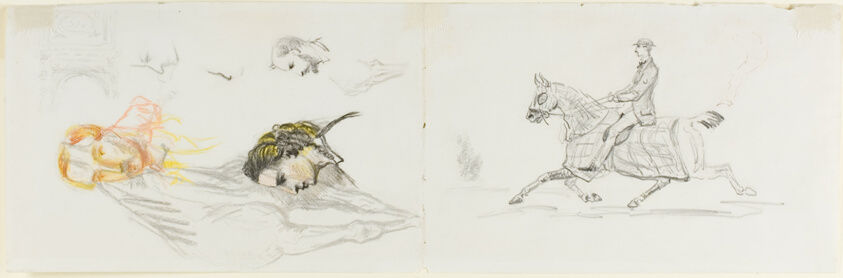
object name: Drawing and Watercolor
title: Horse-Drawn Carriage Preceded by Single Rider (recto); Man Riding Horse with a Blanket and Sketches of Heads, Horses and Triumphal Arch (verso)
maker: Henri de Toulouse-Lautrec (French, 1864-1901)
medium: Graphite (recto), and graphite and pastel and black crayon (verso), on white wove paper (discolored to buff)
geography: France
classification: graphite; drawings (visual works); prints and drawing